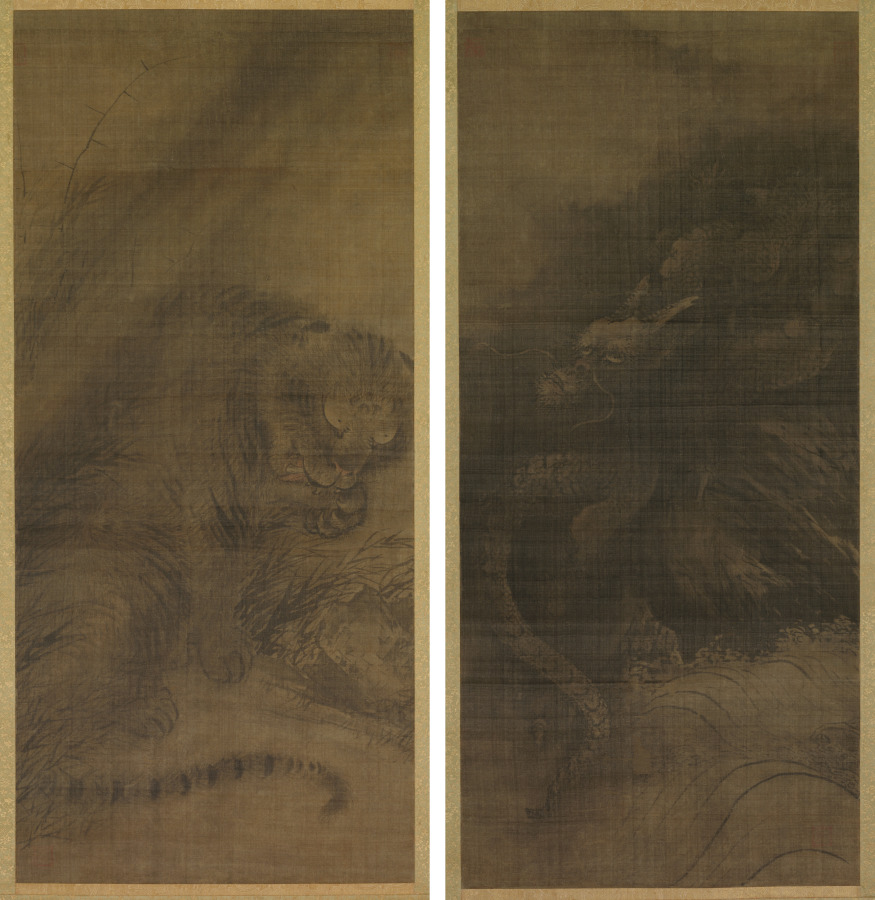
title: Dragon; Tiger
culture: China, Southern Song dynasty (1127-1279)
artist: Fachang Muqi (Chinese, 1220–1280)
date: c. 1250–79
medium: Pair of hanging scrolls; ink on silk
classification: Painting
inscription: 道有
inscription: 雜華室印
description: The dragon and tiger are tied to the philosophical concept of yin and yang, which describes opposite but complementary forces. The dragon occupies a tiered background of waves and mist. Its luminous head emerges from the darker passages, and its narrow twisting body is serpent-like. By contrast, the close-up view of the tiger emphasizes its bulk. The tiger bends its head to lick its paw while its tail curls in the foreground. In their original Chan Buddhist context, this pair of scrolls likely flanked a central image, like the Bodhisattva Guanyin. The silk has darkened over the centuries, and the slight reddish shading in the tiger’s tongue and nose has faded.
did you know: Fachang Muqi's ink paintings on Chan (or Zen in Japanese) themes were very popular in Japan.